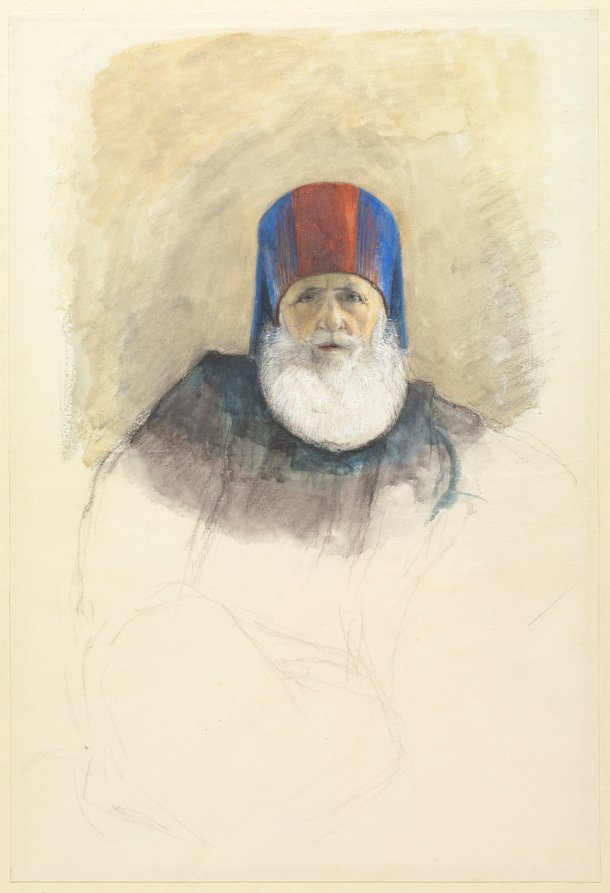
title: Study for Mehmet Ali Pasha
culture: England, 19th century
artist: John Frederick Lewis (British, 1805–1876)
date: c. 1844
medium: watercolor, gouache, black chalk, and graphite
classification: Drawing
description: This drawing was a study for a larger watercolor (now at the Victoria and Albert Museum) of Mehmet Ali Pasha, considered by many as the "Father of Modern Egypt." While European travel to the Middle East burgeoned during the mid 19th century, John Frederick Lewis was more intrepid than most, living and painting in Cairo for a decade. Upon his return to England in 1851, he astonished London audiences with more than 600 watercolors that conjured an exotic world of sumptuous colors and textures articulated in painstaking detail.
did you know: Lord Elphinstone, governor of Madras, described this drawing in an 1845 letter as "the best, and in fact, the only good likeness [of Mehmet Ali Pasha] I have seen, and I saw it within a quarter of an hour of leaving the original."